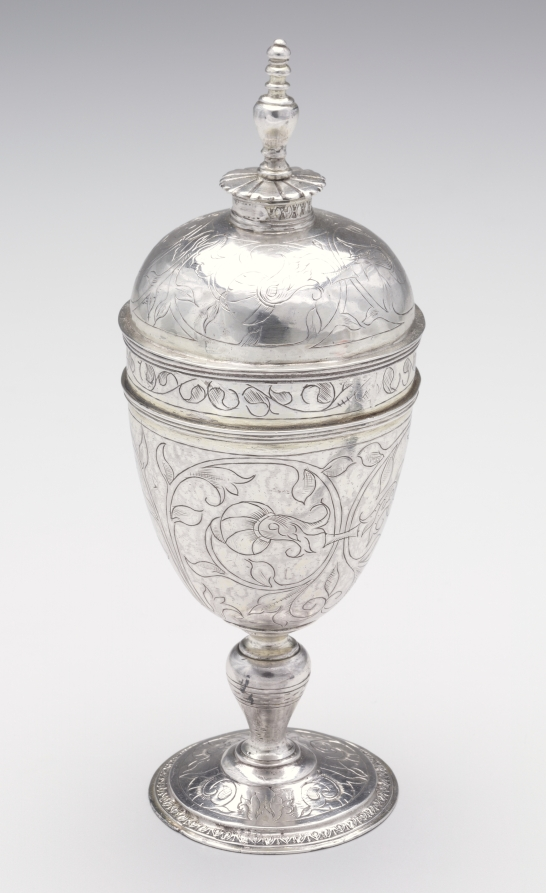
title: Standing Cup and Cover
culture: London, England, late 16th century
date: 1593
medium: silver, partially gilt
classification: Silver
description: Produced during the last years of the Tudor dynasty (1485–1603), this vessel exemplifies the symmetrical patterns, horizontal designs, and clear division of space typical of English silverwork at the time. The functional shape and ornamental designs characteristic of standing cups made them ideal for ceremonial occasions.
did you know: Often made for members of guilds and trade associations in London, standing cups were frequently used during toasts.